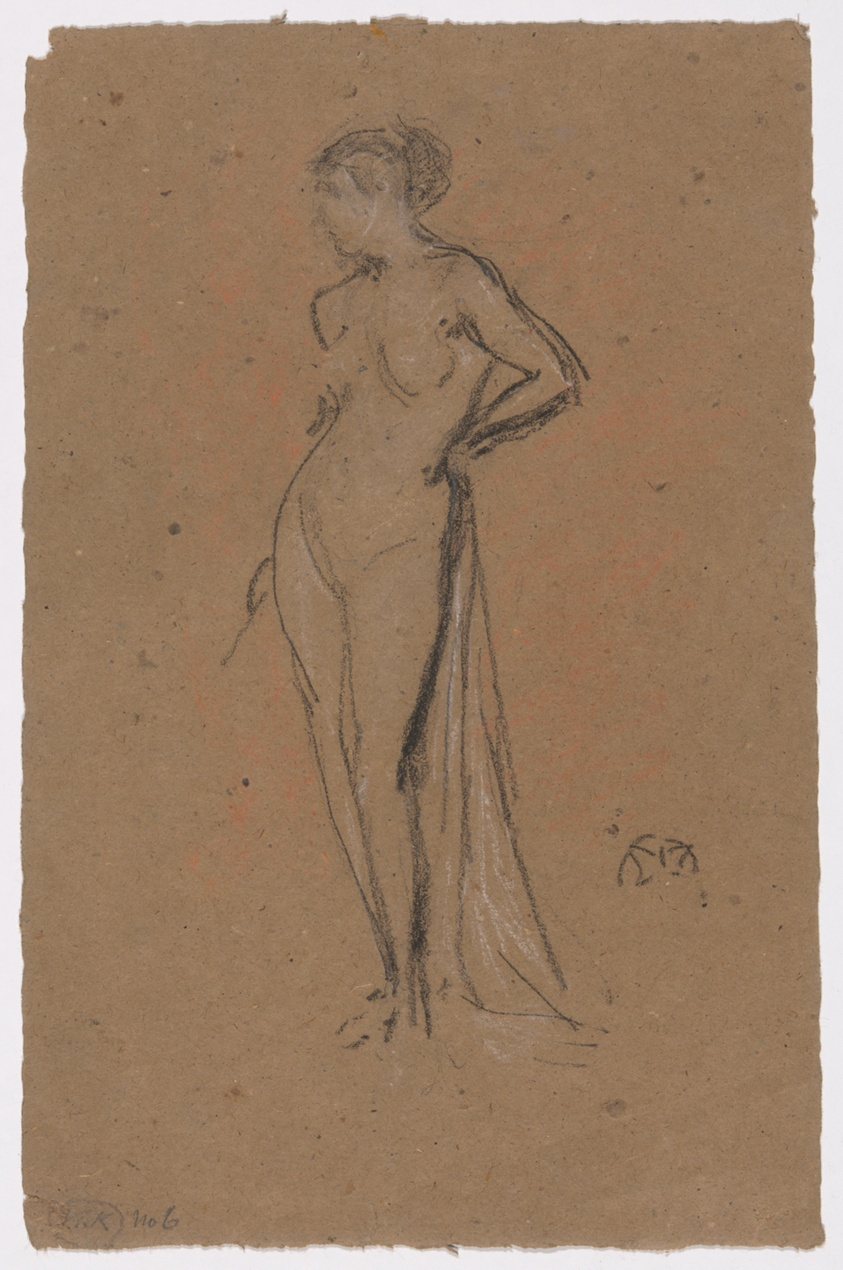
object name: Drawing and Watercolor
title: A Nude Figure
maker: James McNeill Whistler (American, 1834-1903)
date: c. 1878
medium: Charcoal with white and orange chalks on brown wove paper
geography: United States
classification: charcoal; drawings (visual works); prints and drawing; paper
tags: Century of Progress, world's fairs, Chicago World's Fairs